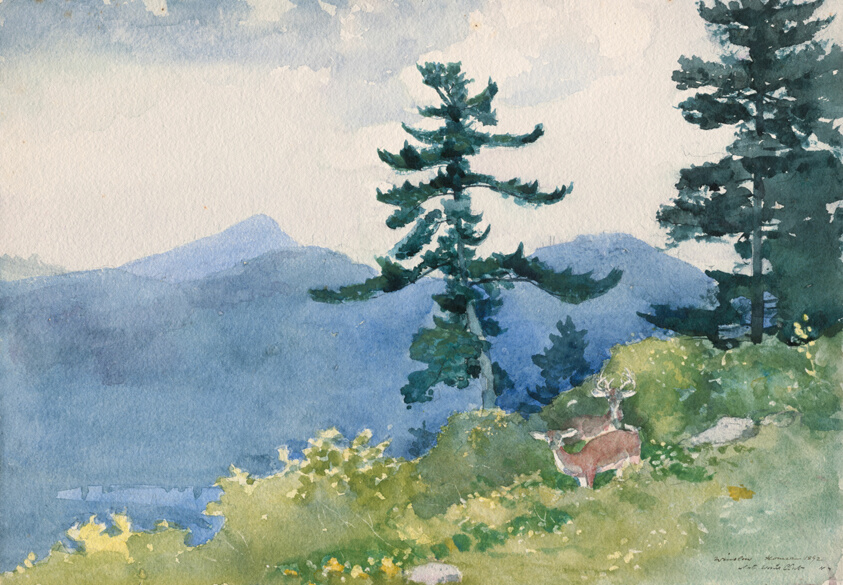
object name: Drawing and Watercolor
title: North Woods Club, Adirondacks (The Interrupted Tete-a-Tete)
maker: Winslow Homer (American, 1836-1910)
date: 1892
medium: Watercolor, with rewetting, blotting and scraping, over graphite, on thick, moderately textured, ivory wove paper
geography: United States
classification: drawings (visual works); prints and drawing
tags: Century of Progress, animals, hunting, world's fairs, Chicago World's Fairs, wilderness